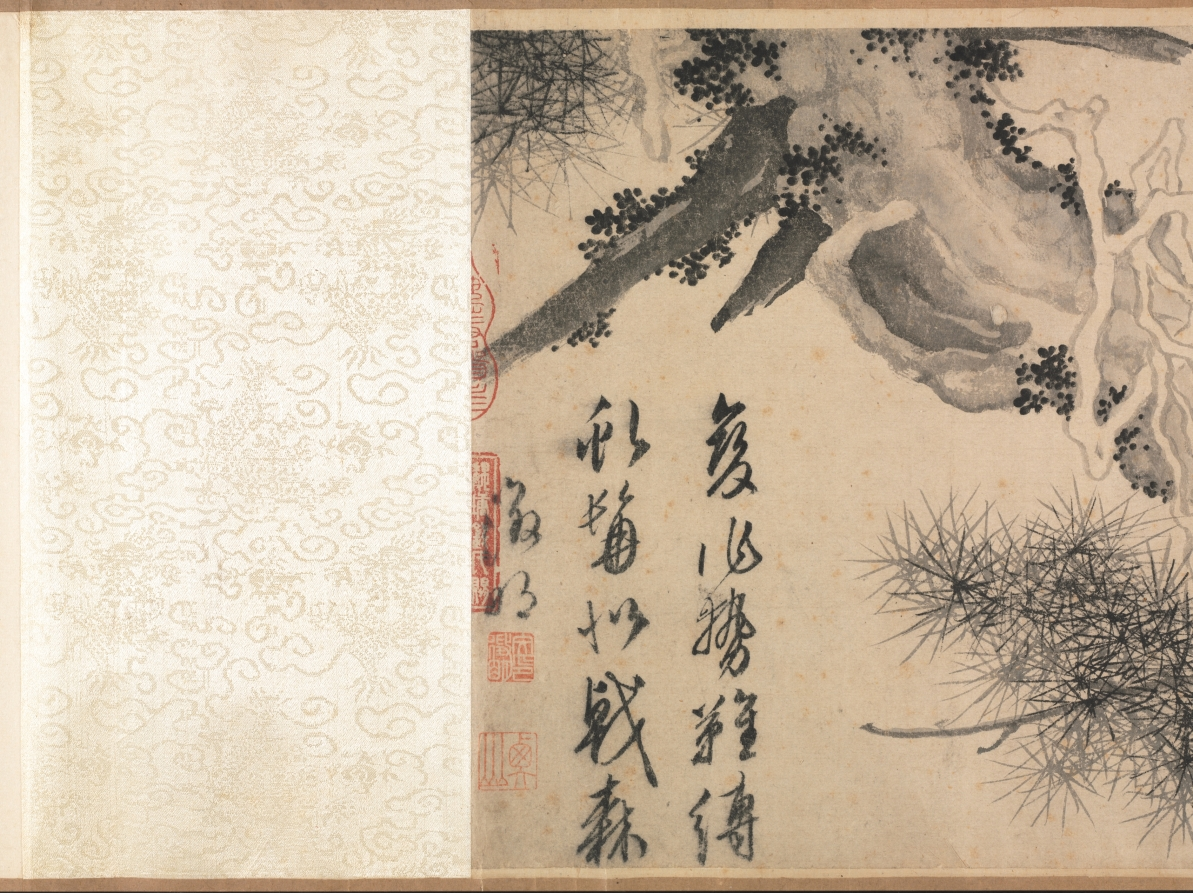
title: Old Pine Tree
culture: China, Ming dynasty (1368–1644)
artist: Wen Zhengming (Chinese, 1470–1559)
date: late 1530s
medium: handscroll; ink on paper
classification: Painting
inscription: 變化勢難縛，虬髯似戟森. 徵明 [印]文徵明印; 衡山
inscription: 2 partial seals of Qian Shisheng 錢士昇 (1575–1652)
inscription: 8 imperial seals: 6 of the Qianlong emperor (r. 1736–95); 1 of the Jiaqing emperor (r. 1796–1821); 1 of the Xuantong emperor (r. 1909–11).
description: Here the natural appearance of a gnarled and vine-entangled pine has been transformed into a rhythmic abstraction of brushstrokes and ink tonalities, with unifying opposites—opening and closing, rising and falling—that provide the design across the horizontal scroll. The artist's inscription reads: "The force of change beyond restraint; / The dragon's whiskers are likened to a forest of spears."